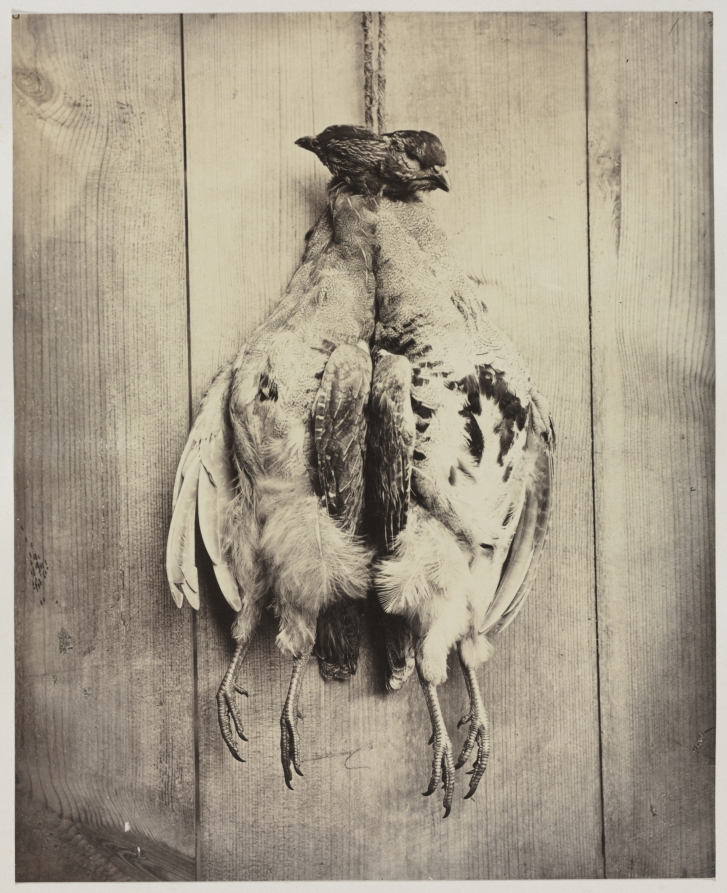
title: Partridges (recto)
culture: England, 19th century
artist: Captain N. Baily (British)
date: c. 1861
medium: albumen print from wet collodion negative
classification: Photograph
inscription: Written in ink on pasted paper on recto: "Partridges/W. Baily, Esq." (writing on back of pasted label)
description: N. Baily carefully arranged a simple composition of two partridges hanging by a thin rope against a plain wood wall. Like many photographers in the 1850s and '60s, he was interested in displaying the camera’s ability to record in detail the variety of shapes and textures present in the still life. Little is known of Baily, a British amateur photographer. He was a member of the Amateur Photographic Association and participated in several of their album exchanges. Still lifes incorporating game, fowl, and fish were popular among amateur photographers during this period. Many members of the Amateur Photographic Association were gentlemen that formerly belonged to the British armed forces and would have participated in hunting as a pastime.